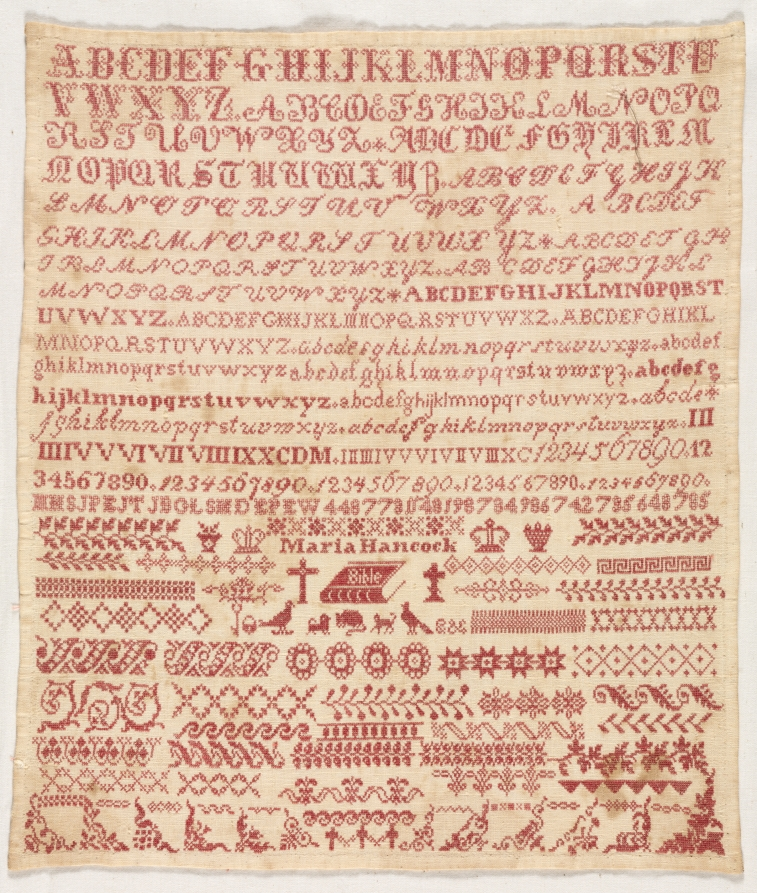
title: Sampler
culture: England, 19th century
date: 1800s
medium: embroidery; cotton on cotton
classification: Sampler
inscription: rows of alphabets and numerals in various scripts; signed: "Maria Hancock."